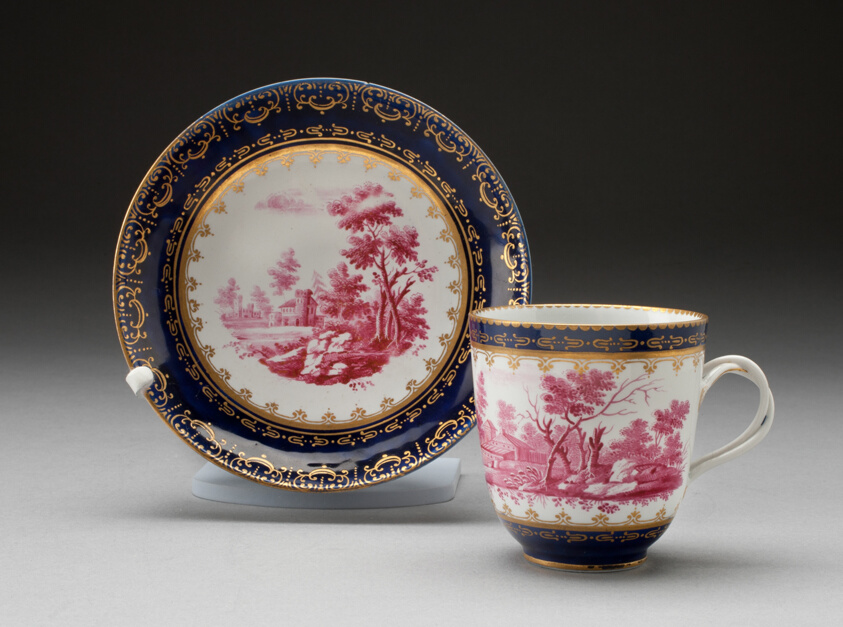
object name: Ceramics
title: Cup and Saucer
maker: Doccia Porcelain Factory; Italian, founded 1737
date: c. 1775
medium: Tin-glazed hard-paste porcelain with underglaze blue, pink enamel and gilding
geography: Doccia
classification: drinking vessel; porcelain; ceramics; european decorative arts